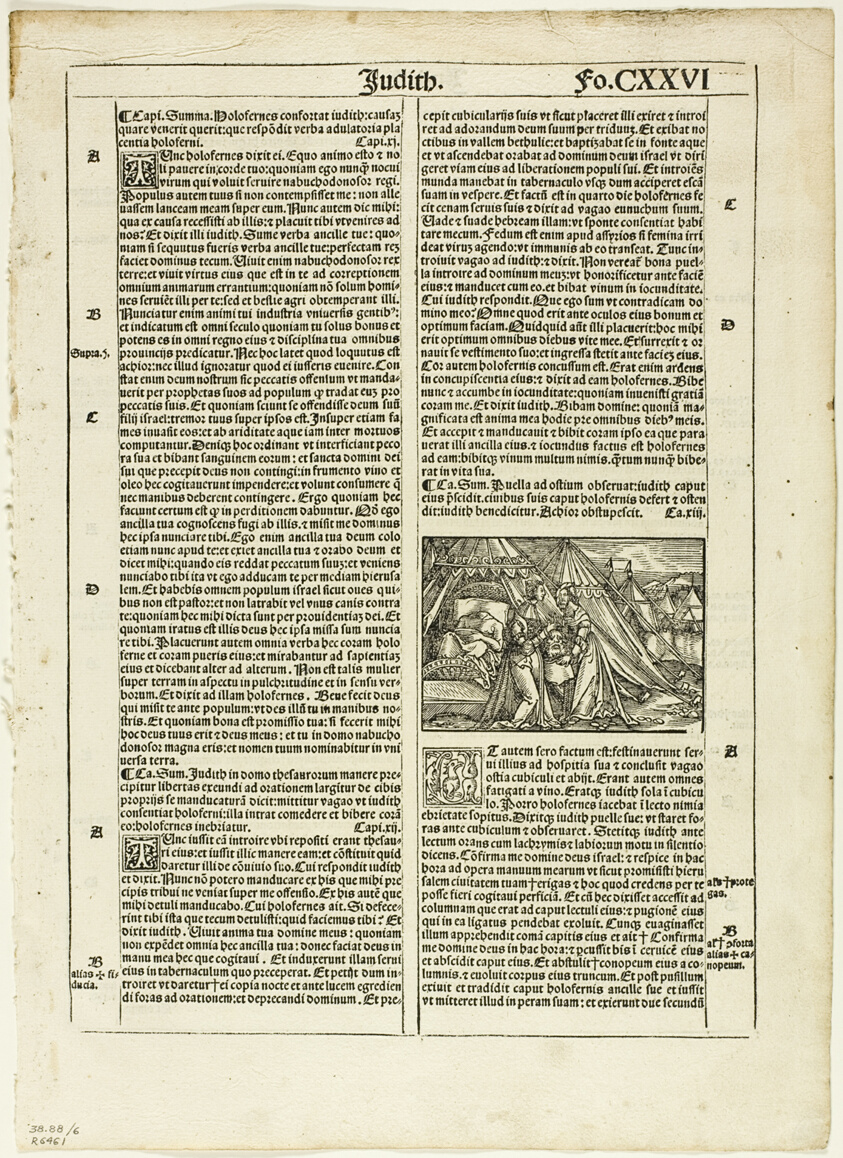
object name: Print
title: Judith and Her Maid Placing the Head of Holofernes in a Bag from Biblia latina, plate six from Woodcuts from Books of the XVI Century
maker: Attributed to Hans Springinklee (German, c. 1495-after 1522) or Erhard Schön (German, 1491-1542); assembled by Max Geisberg (Swiss, 1875-1943)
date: 1522, assembled into portfolio 1937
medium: Woodcut on paper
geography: Germany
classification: woodcut; print; prints and drawing